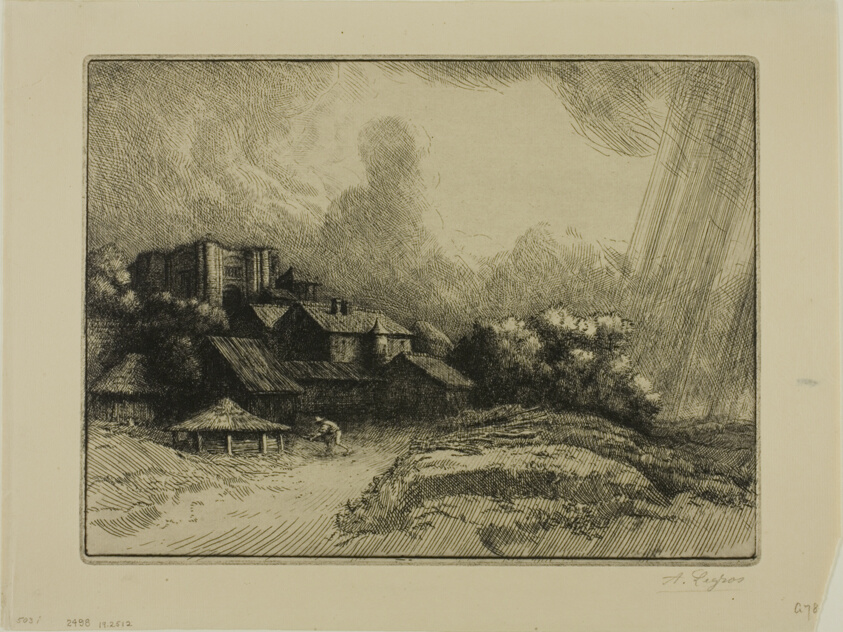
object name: Print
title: The Abbey Farm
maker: Alphonse Legros (French, 1837-1911)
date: c. 1893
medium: Etching and drypoint on buff laid paper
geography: France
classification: etching; print; prints and drawing